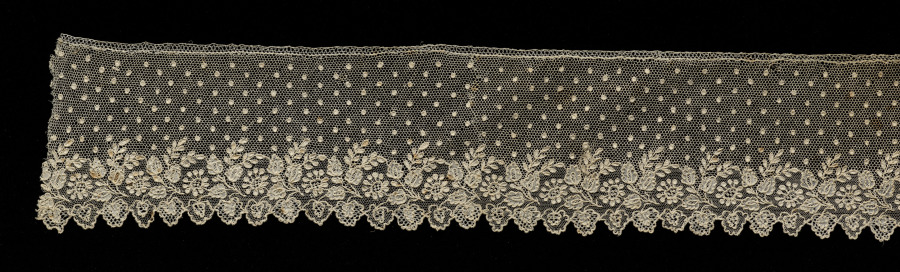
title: Lace Edging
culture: France, Alençon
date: 1700s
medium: Linen: needle lace (Point d'Alençon)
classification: Lace